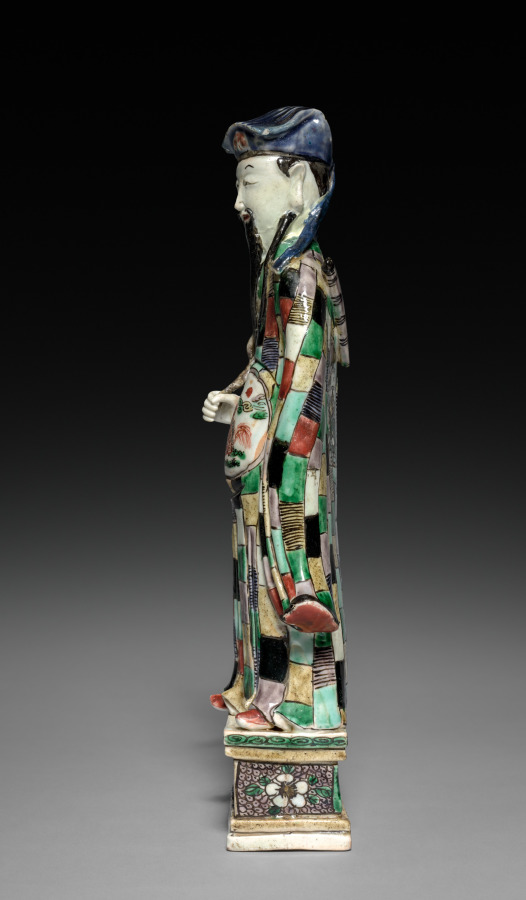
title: Daoist Immortal Zhongli Quan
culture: China, Jiangxi province, Jingdezhen kilns, Qing dynasty (1644-1911), Kangxi reign (1662-1722)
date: 1662–1722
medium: porcelain with famille verte overglaze enamel decoration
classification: Ceramic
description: This porcelain figure represents Zhongli Quan as a scholar. He is wearing a scholar’s hat and carries a scroll on his back. He holds a fan that, according to legend, could bring the dead to life. Thus, he also bears the auspicious meaning of longevity. On his bare belly, the potter painted a qilin, a mythical auspicious creature that turns his head to the sun. The same design in different colors also decorates his back.